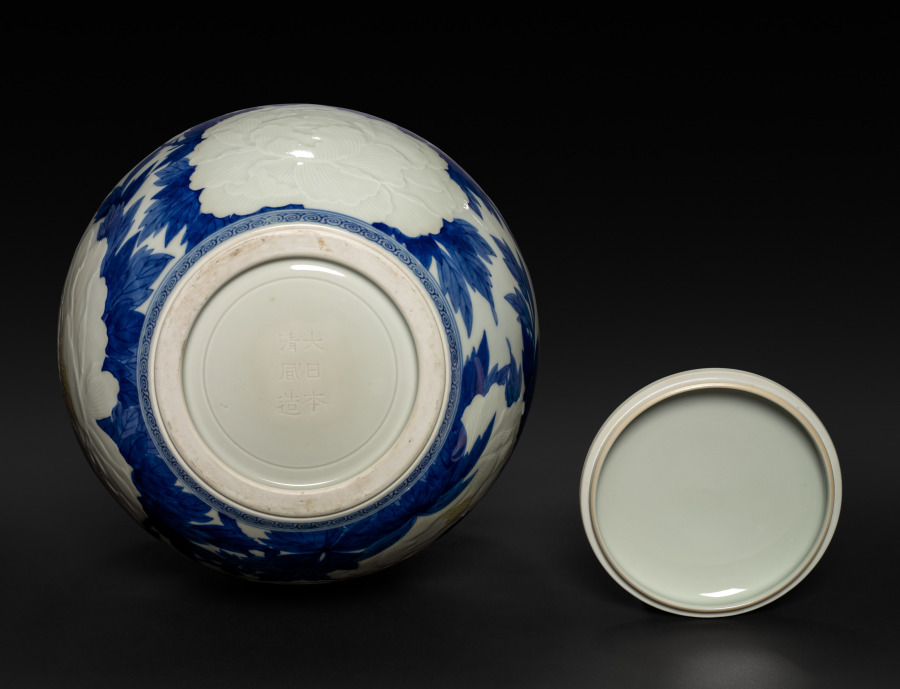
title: Lidded Jar with Peonies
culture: Japan, Meiji period (1868–1912)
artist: Seifū Yohei III (Japanese, 1851–1914)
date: 1897–1912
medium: Porcelain with molded and carved design and underglaze color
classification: Ceramic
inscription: 大日本清風造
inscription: 金聲玉振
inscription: 帝室技芸員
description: The petals of the large, white peonies on this jar were made by applying molded clay to the body and incising the clay with lines for definition. The flowers’ centers were then painted with yellow, along with the leaves in cobalt blue line and wash. A subtle blue gradation was also added all around the flowers using a masking method. The lid, with its treasured jewel-shaped finial, was also decorated with foliate motifs in underglaze cobalt blue. Finally, a transparent glaze was applied over the entire body of both the jar and lid. It is a special demonstration of Yohei III’s use of precision and control to create a completely balanced composition.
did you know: Seifū Yohei III drew inspiration from Qing dynasty Chinese wares but experimented widely with new glazing techniques.